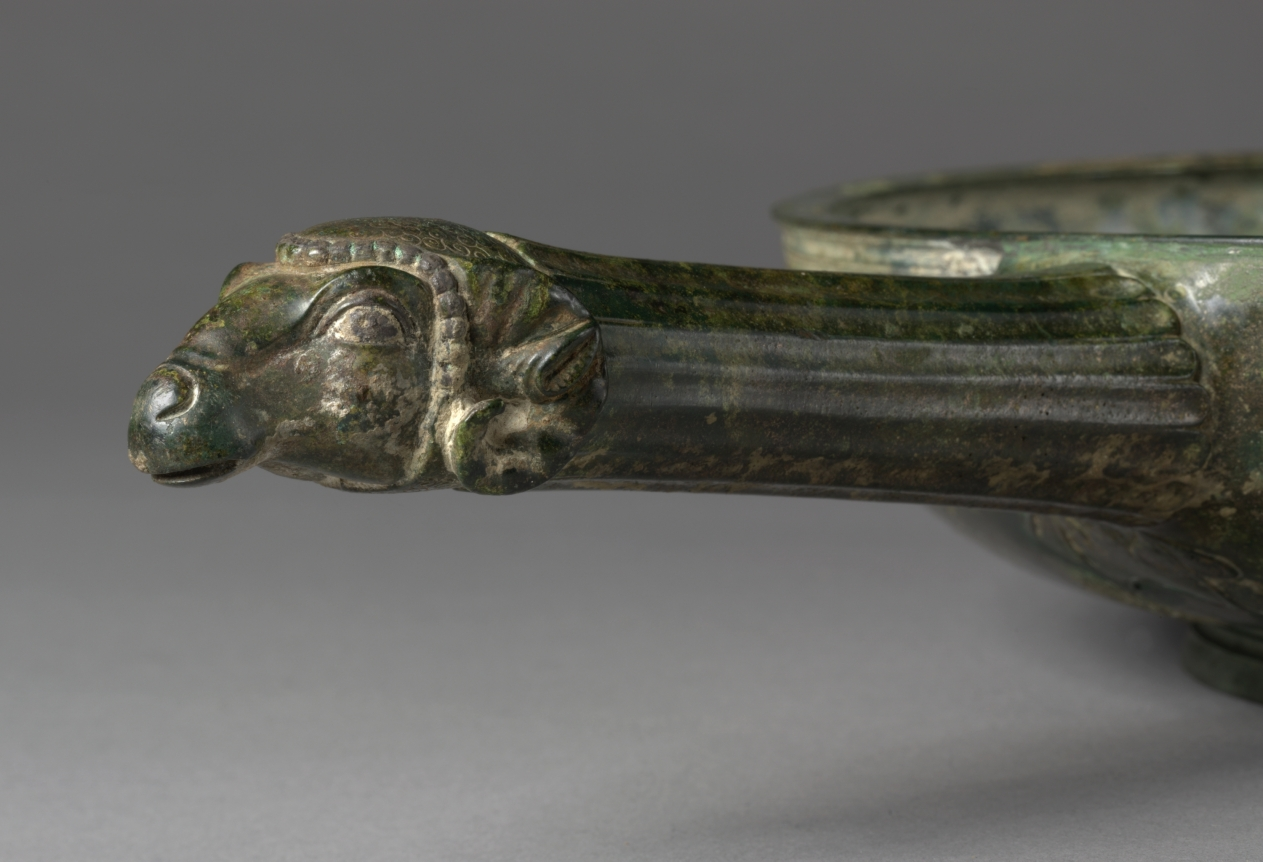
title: Patera with Fluted Handle and Ram Head Finial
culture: Greece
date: 500–400 BCE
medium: bronze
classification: Metalwork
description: This patera is made from a shallow bronze dish attached to a fluted handle, terminating in a ram’s head. The ram’s head is realistically rendered through careful modeling and a high level of detail. Though the patera looks much like a modern frying pan, in antiquity it would have been used for pouring wine during important rituals.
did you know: Ivy leaves, like the tiny example found under the patera's handle, were associated with wine and revelry.